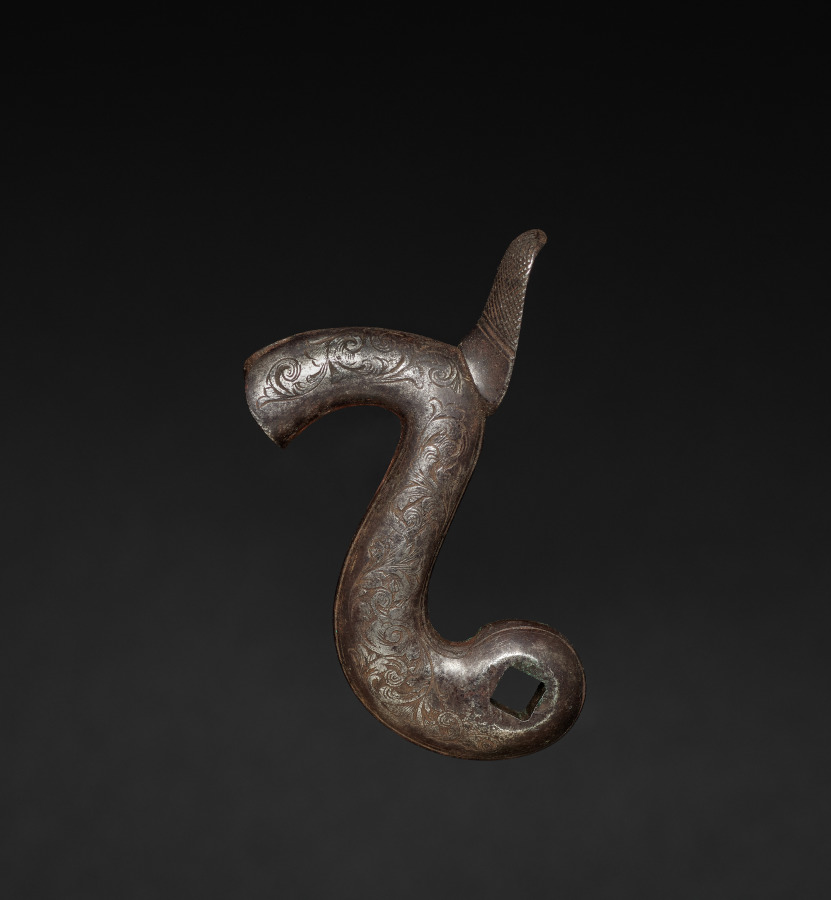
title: Gun-Lock Hammer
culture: England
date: c. 1800–1825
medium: steel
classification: Arms and Armor